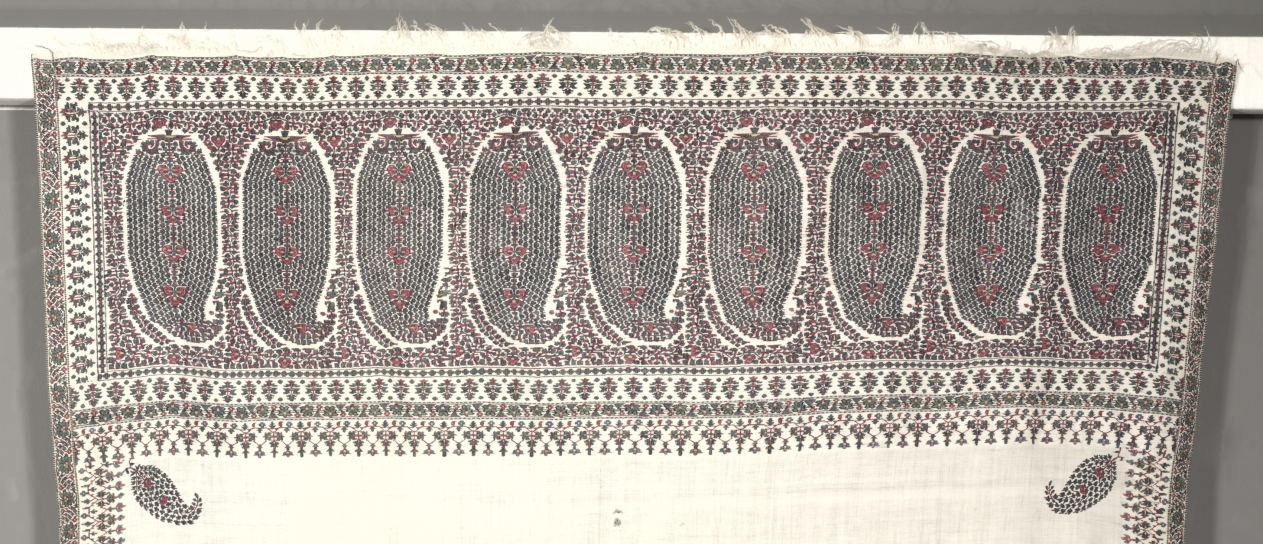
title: Long Shawl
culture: India, Kashmir, 19th century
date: c. 1815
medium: 2/2 twill tapestry weave, double interlocked; embroidery; wool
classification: Textile